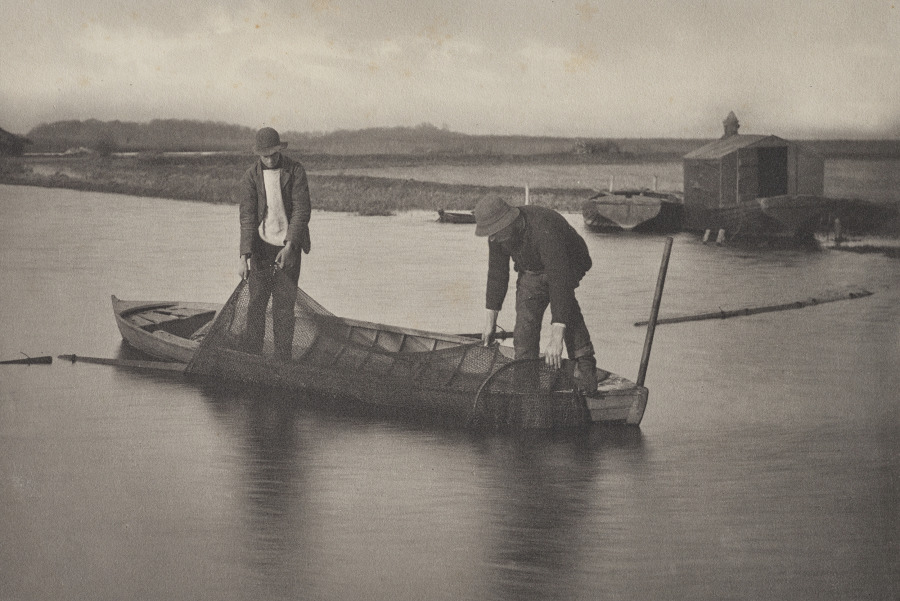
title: Taking Up the Eel Net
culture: England , 19th century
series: Life and Landscape on the Norfolk Broads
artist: Peter Henry Emerson (British, 1856–1936)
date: 1886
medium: platinum print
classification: Photograph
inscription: Written in pencil on verso of mount: “Taking Up the Eel Net”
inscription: Written in pencil on verso of mount: “C268 RPC/$2100.00”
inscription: Imprinted in sheet retained with photograph/mount: “Plate VII./Taking Up the Eel-Net”